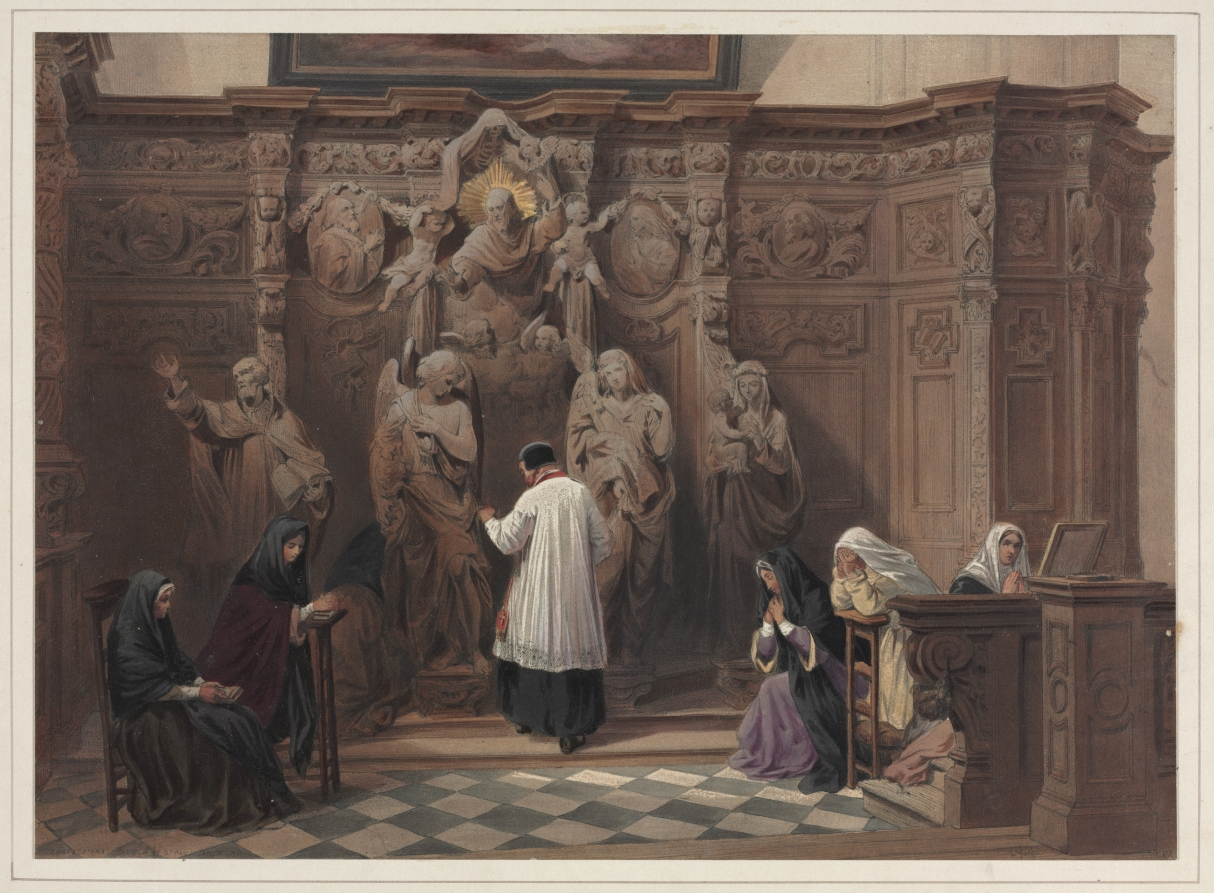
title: Confessional, Church of St. Paul, Antwerp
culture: England, 19th century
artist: Louis Haghe (British, 1806–1885)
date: 1838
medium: color lithograph with hand coloring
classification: Print